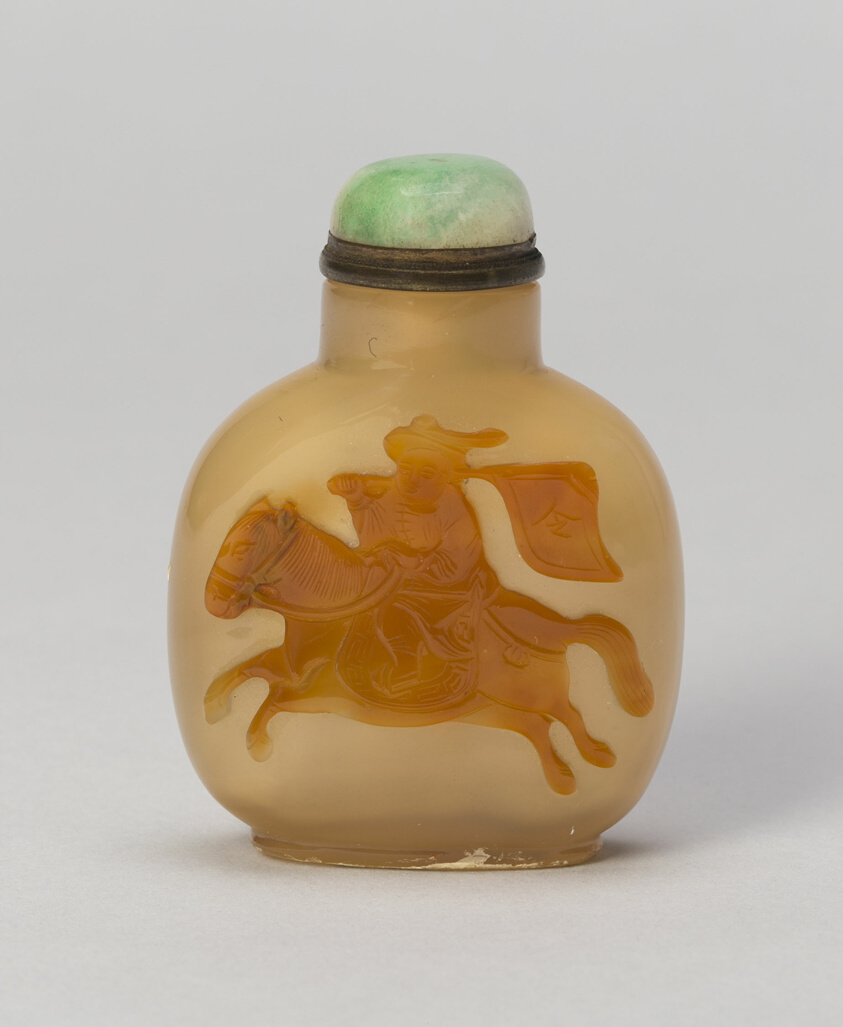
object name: Vessel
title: Snuff Bottle with Equestrian Bannerman with Flag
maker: China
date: Qing dynasty (1644–1911), 1800–1900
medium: Chalcedony with carved decoration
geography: China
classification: snuff bottle; asian art; vessel